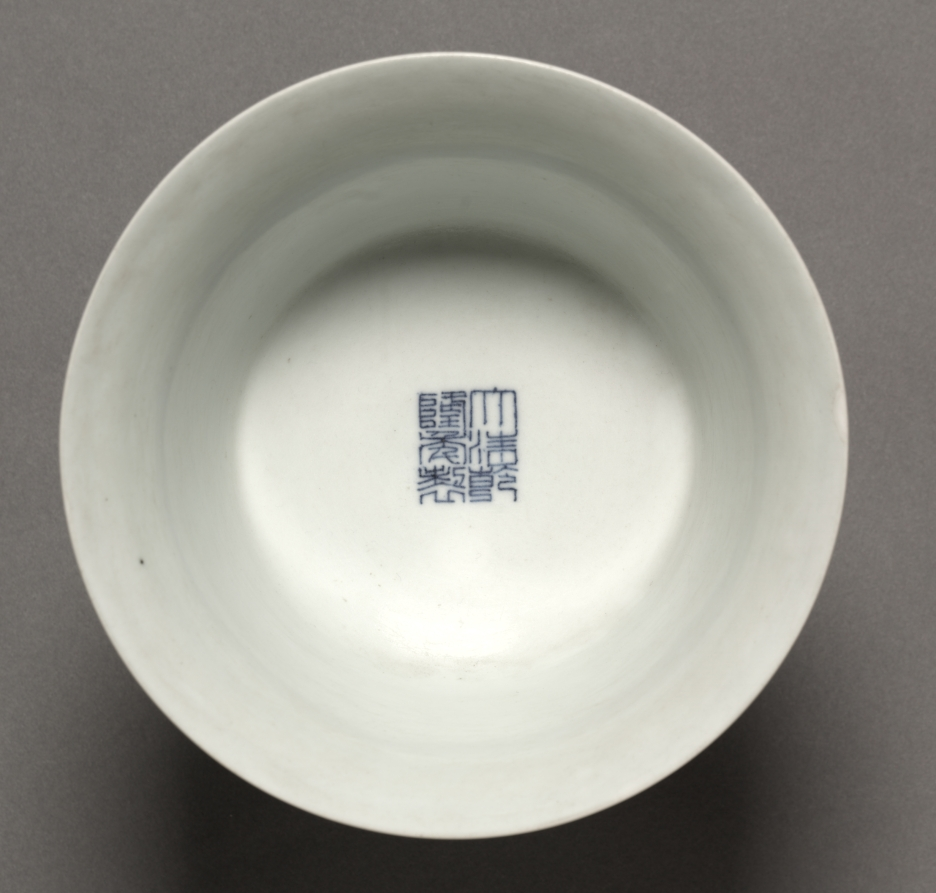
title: Stem Cup with Tibetan Characters and Buddhist Symbols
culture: China, Qing dynasty (1644-1911), Qianlong mark and reign (1736-95)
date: 1736–95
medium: porcelain with underglaze blue decoration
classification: Ceramic